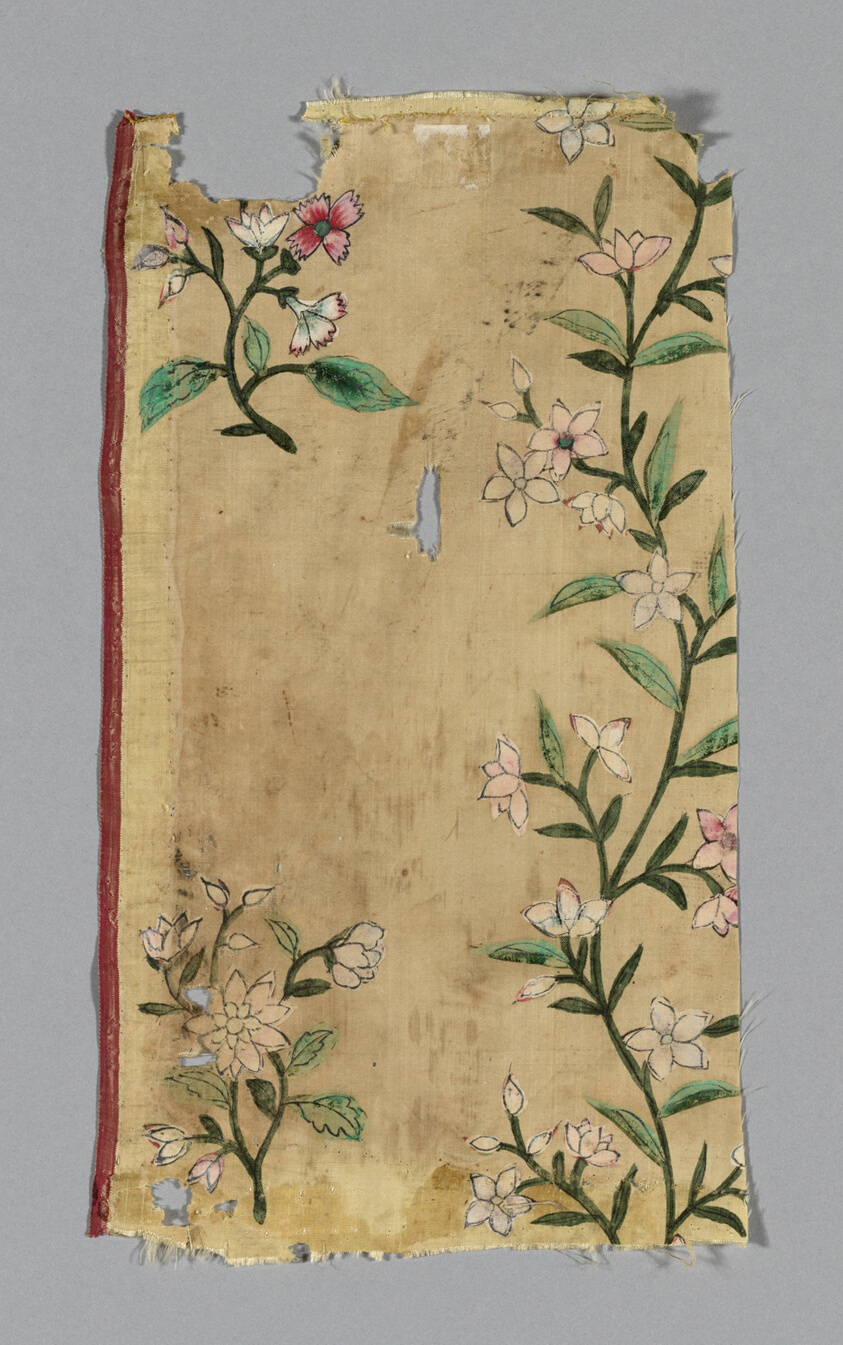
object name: Textile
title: Fragment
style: qing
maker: China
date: 18th century, Qing dynasty (1644–1911)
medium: Silk, plain weave, painted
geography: China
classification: textile; weaving - printed